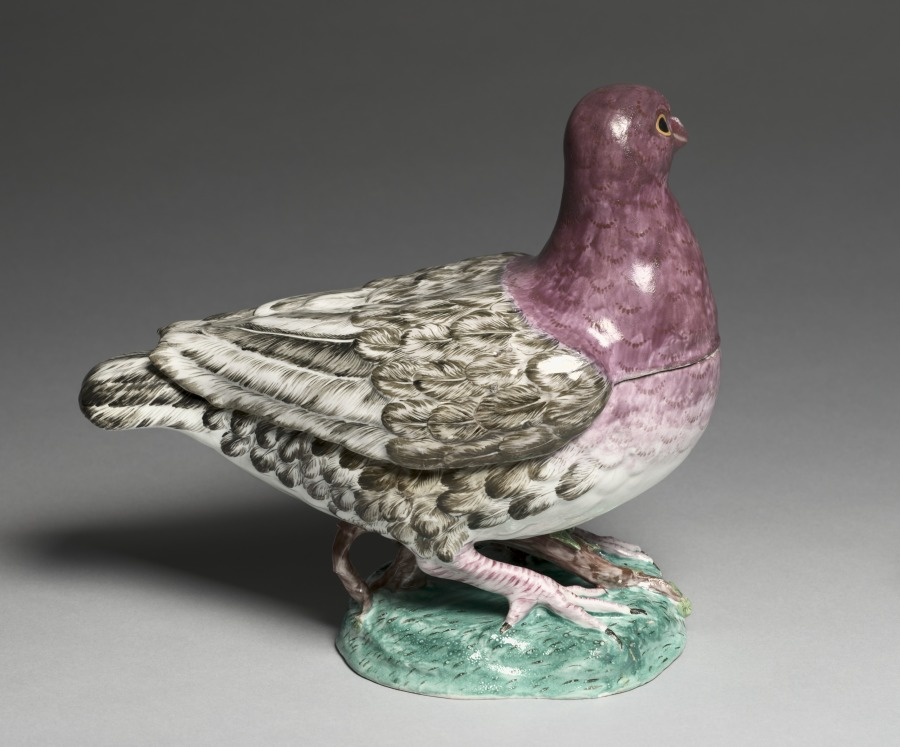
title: Covered Tureen in the Form of a Pigeon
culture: France, 18th century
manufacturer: Sceaux Factory (French, active 1748–66)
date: c. 1760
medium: Tin- glazed earthenware (faience) wth enamel decoration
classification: Ceramic